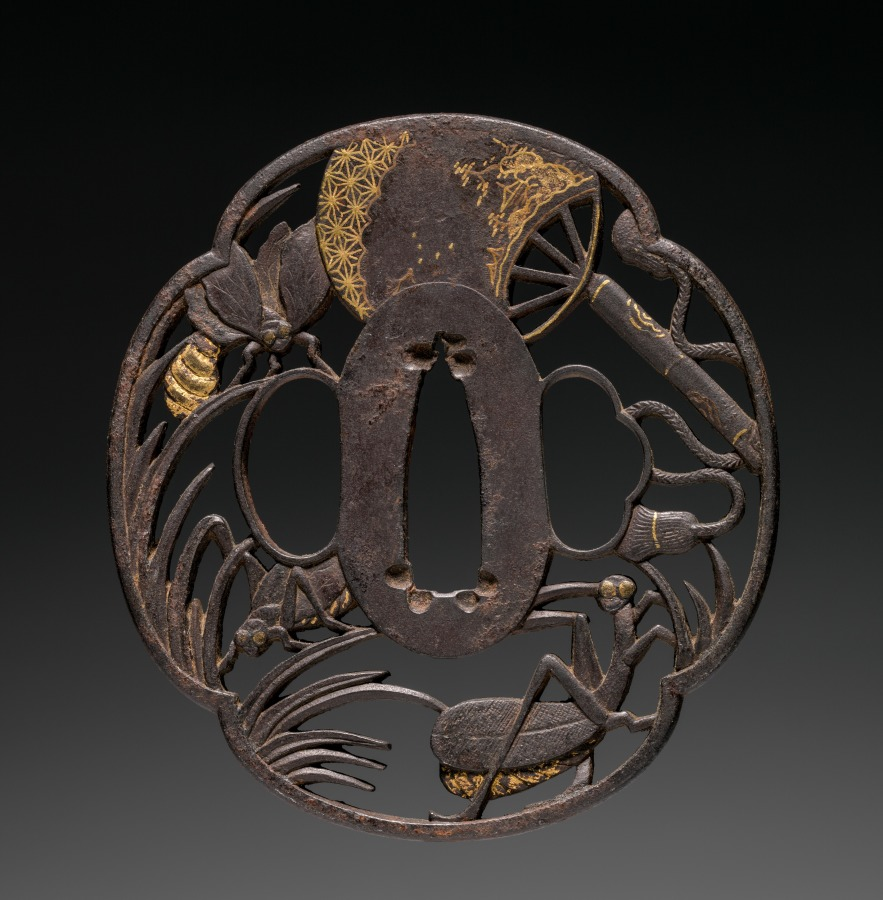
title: Sword Guard (Tsuba) with Insects and Fan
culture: Japan, possibly Edo period (1615-1868)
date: c. 1615–1868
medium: iron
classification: Arms and Armor